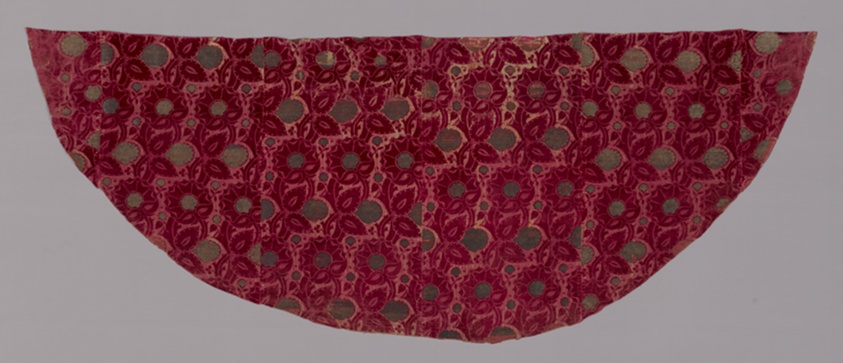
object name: Religious/Ritual Object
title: Cope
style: 15th century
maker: Italy, probably Venice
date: 1460-70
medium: Silk and gilt-metal-strip-wrapped silk, warp-float faced 4:1 satin weave with supplementary brocading wefts bound by main warps in weft-float faced 1:4 'S' twill interlacings and with supplementary pile warps forming cut voided velvet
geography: Venice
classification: weaving - velvet; liturgical; textile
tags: vestments, botanical/floral, flowers, foliage, fruit, pomegranates